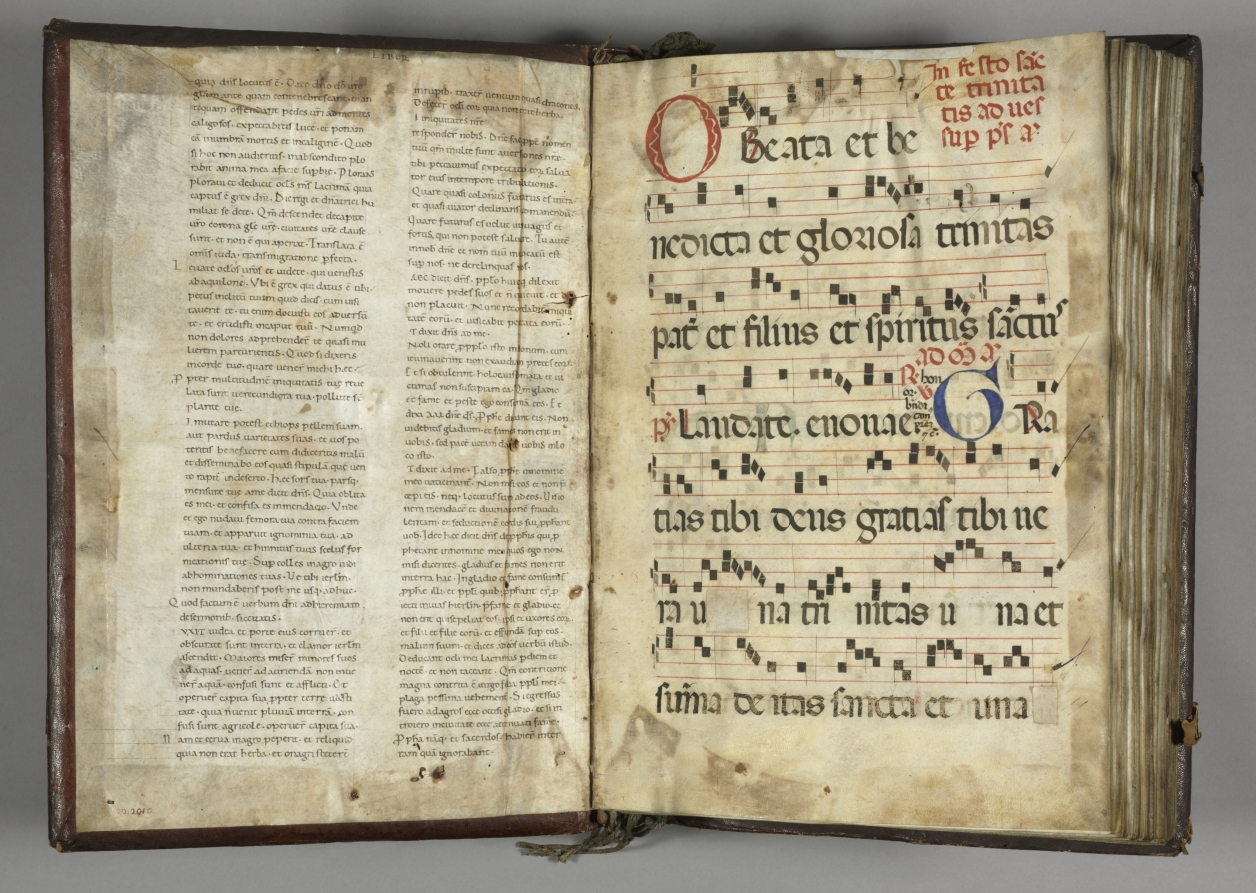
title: Choir Book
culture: Italy, 16th century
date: 1500s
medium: leather binding, copper alloy buckles, lead seal, parchment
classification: Manuscript